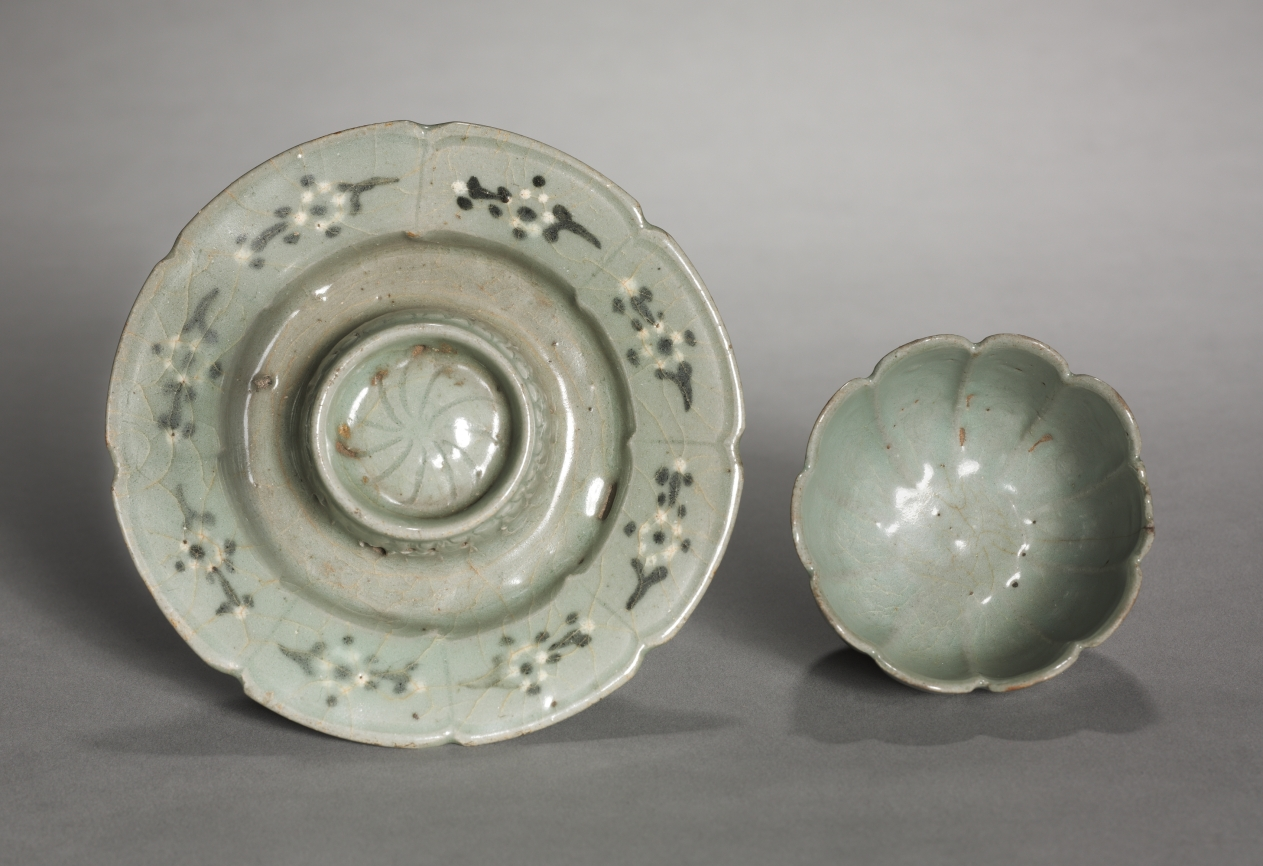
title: Floral-shaped Cup and Saucer with Inlaid Chrysanthemum Design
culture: Korea, Goryeo dynasty (918–1392)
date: 1100s-1200s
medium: Celadon ware with inlaid white and black slip decoration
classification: Ceramic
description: In Korea, chrysanthemum flowers and leaves were made into both tea and wine. Chrysanthemum wine was enjoyed during the the Double Nine Festival (the ninth day of the ninth month in the lunar calendar) praying for longevity. The flower design on the saucer is less delicate than the cup, suggesting that the cup and saucer originally were not related to each other.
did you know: Elites of the Goryeo period are known for their love of drinking tea and wine. In Korea, chrysanthemum flowers and leaves were made into both tea and wine.